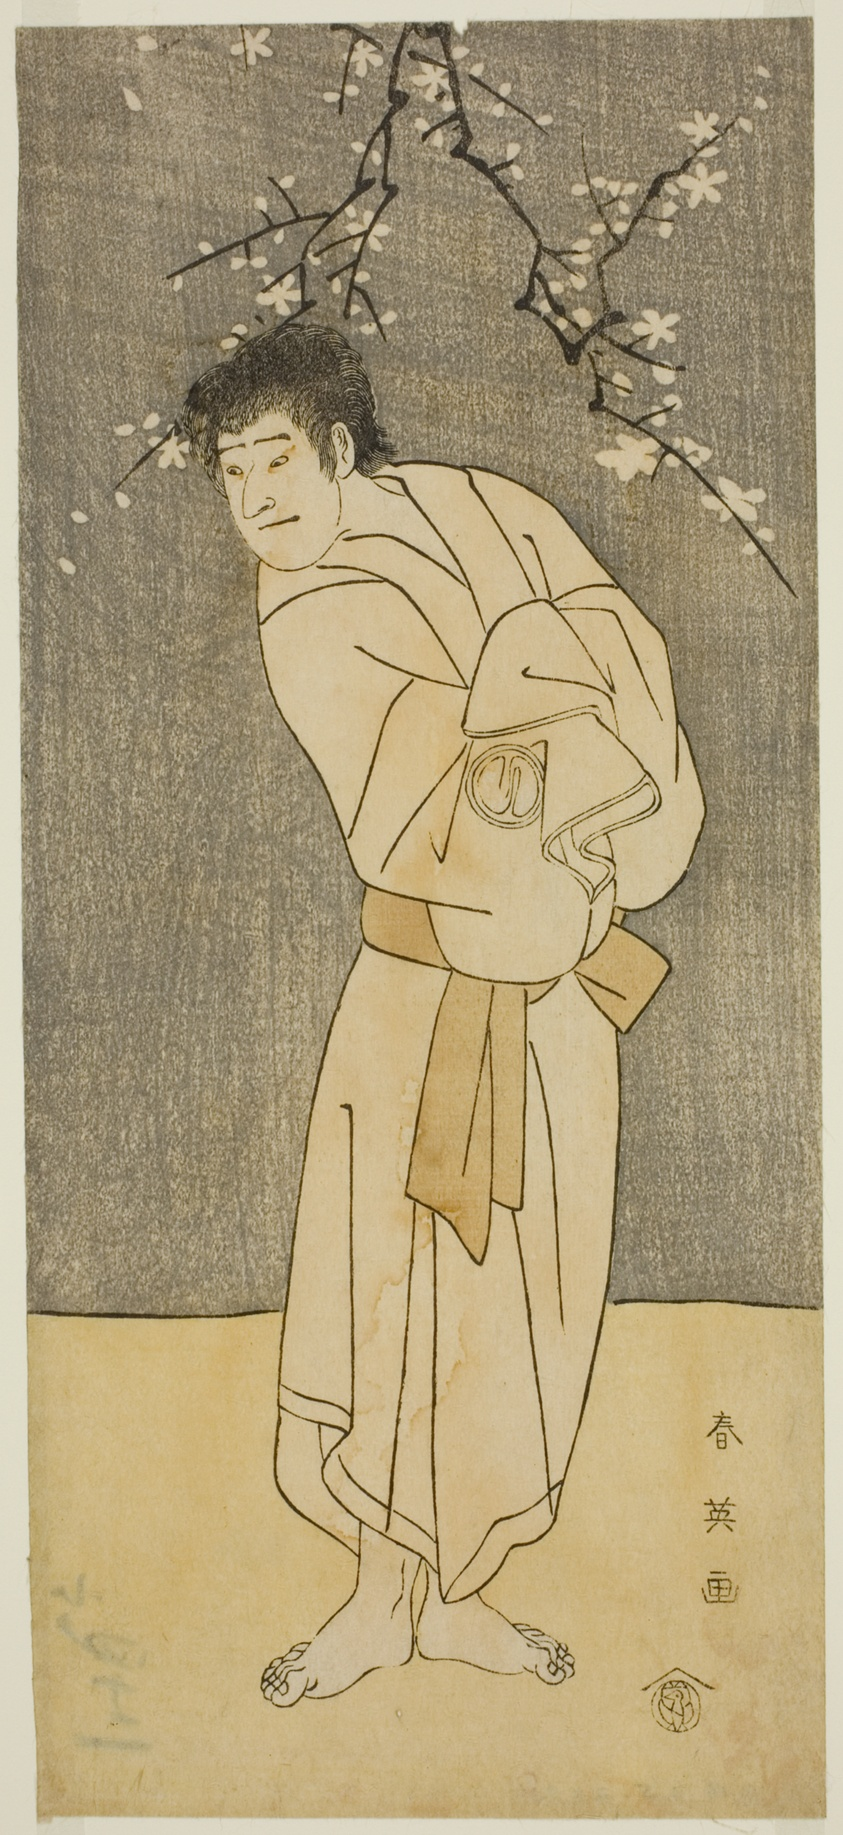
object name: Print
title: The Actor Sawamura Sojuro III as the Monk Seigen (?) in the Play Saikai Soga Nakamura (?), Performed at the Nakamura Theater (?) in the First Month, 1793 (?)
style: Japanese (culture or style)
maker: Katsukawa Shun'ei (Japanese, 1762-1819)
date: c. 1793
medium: Color woodblock print; hosoban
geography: Japan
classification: woodblock print; print; asian art